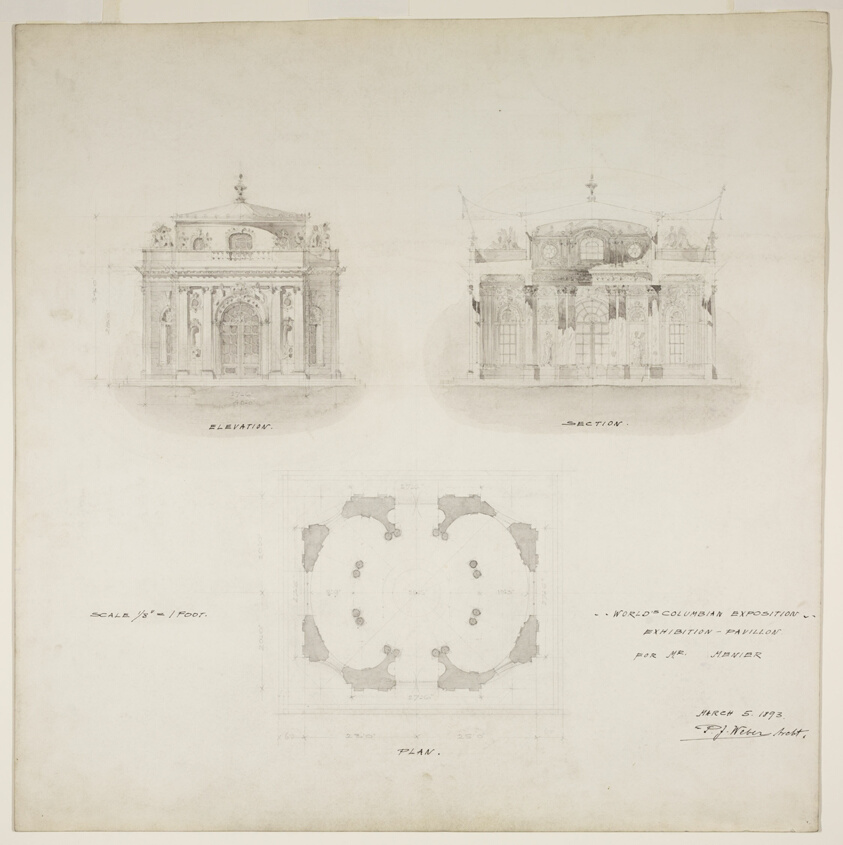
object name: Architectural Drawing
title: World's Colombian Exposition Chocolate-Menier Pavilion, Chicago, Illinois, Plan, Elevation, and Section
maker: Peter J. Weber; American, born Germany, 1863-1923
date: 1893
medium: Graphite and wash with ink lettering on illustration board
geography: Chicago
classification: design drawing; architectural drawing; architecture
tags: Chicago